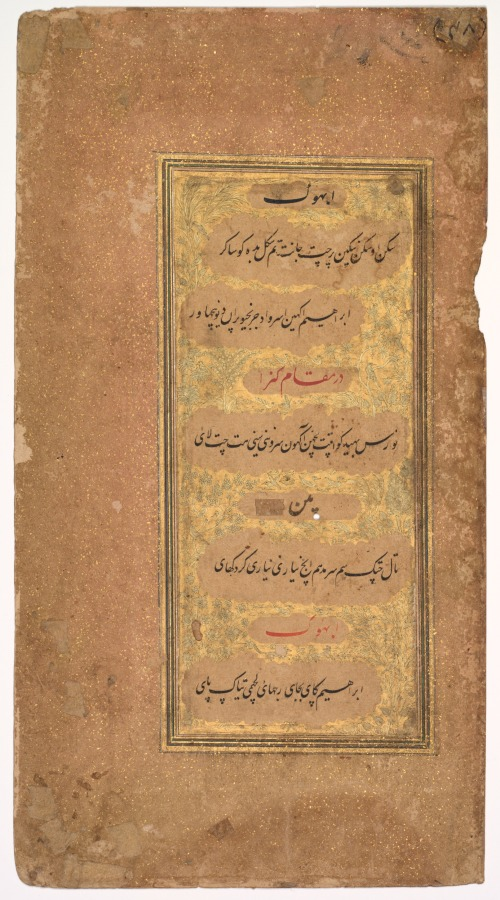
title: From Dohras (Songs) 40 and 42 from the Kitab-i Nauras (Book of Nine Essences) of Sultan Ibrahim Adil Shah II of Bijapur (r. 1580–1627); verso: From Dohras (Songs) 40 and 36 from the Kitab-i Nauras of Sultan Ibrahim Adil Shah II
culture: India, Bijapur, Deccan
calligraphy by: Khalilullah Butshikan (Persian, active in India 1596–c. 1620)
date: 1618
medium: ink with two-tone gold on paper, double-sided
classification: Painting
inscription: Deccani Urdu (Karnati) lyrics in nasta‘liq script: . . . because being itself a sea of knowledge, it could know good omens from the bad ones. Ibrahim is praying for its long life and prosperity. Give a patient hearing and listen to the description of the nine essences, which I am just giving to you. Its rhythm is chatak sam, its note is madhyam. It is very creative. Ibrahim sings and plays and attracts and forgets to have attachment to wealth and riches. (after Ahmad 1956, 116–17, 141–42); Verso: Deccani Urdu (Karnati) lyrics in nasta‘liq script: We are the true devotees of Shiva, and our devotion and attachment to him are daily towards increase. “Karnati” is a lady of surpassing beauty, with white complexion resembling kevra flower, is dressed in a blue sari and a yellow bodice. Her hands resemble the white esculent lotus in tenderness, and the eyes are similar to the ordinary lotus in attraction. It is the spring season, and the Indian cuckoo, sitting on the heavenly tree is vociferating. The lady who is suffering from the pangs of separation is advised not to be grieved, for her lover would soon arrive.” (after Ahmad 1956, 114–16, 140–42)